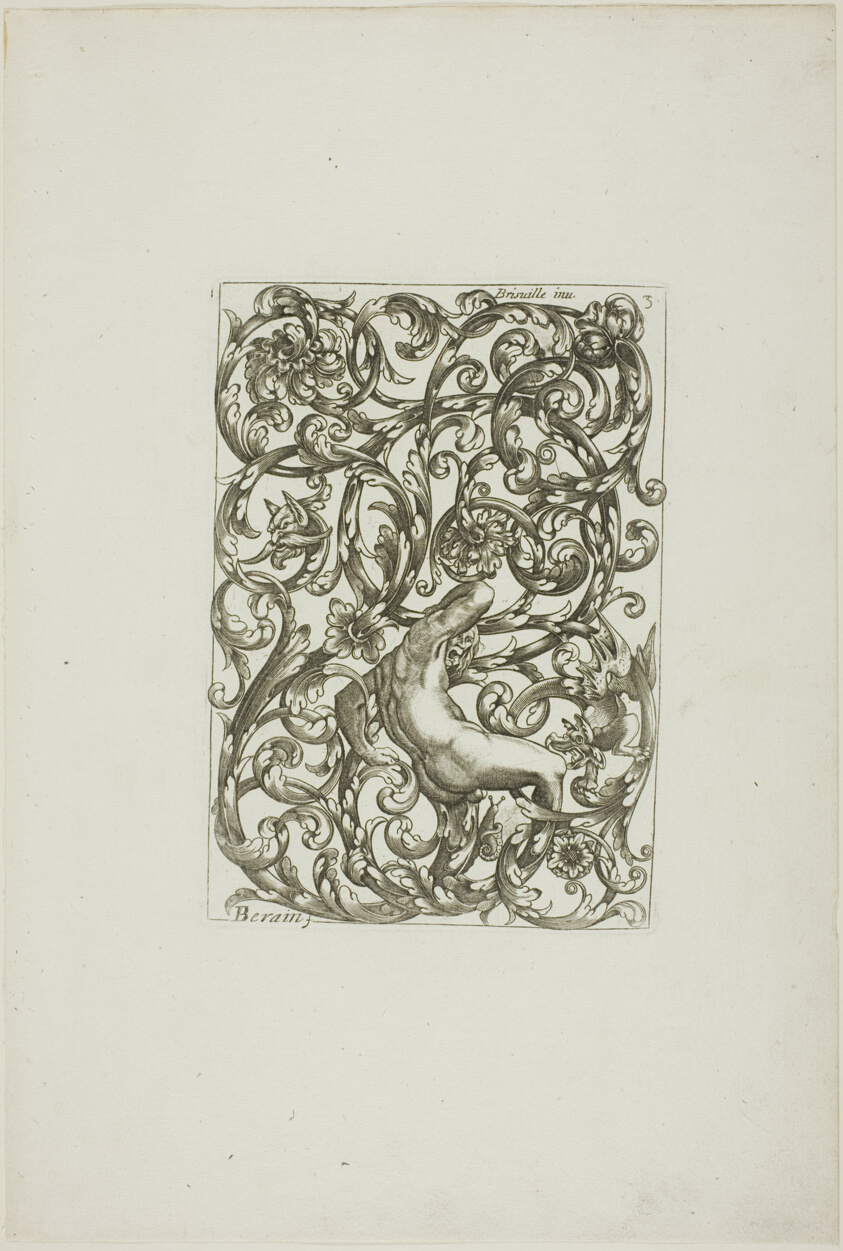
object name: Print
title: Designs for Locksmiths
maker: Jean Bérain I (French, 1640-1711); after Hugues Brisville (French, active 1663)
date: c. 1670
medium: Etching on ivory laid paper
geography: France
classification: etching; print; prints and drawing